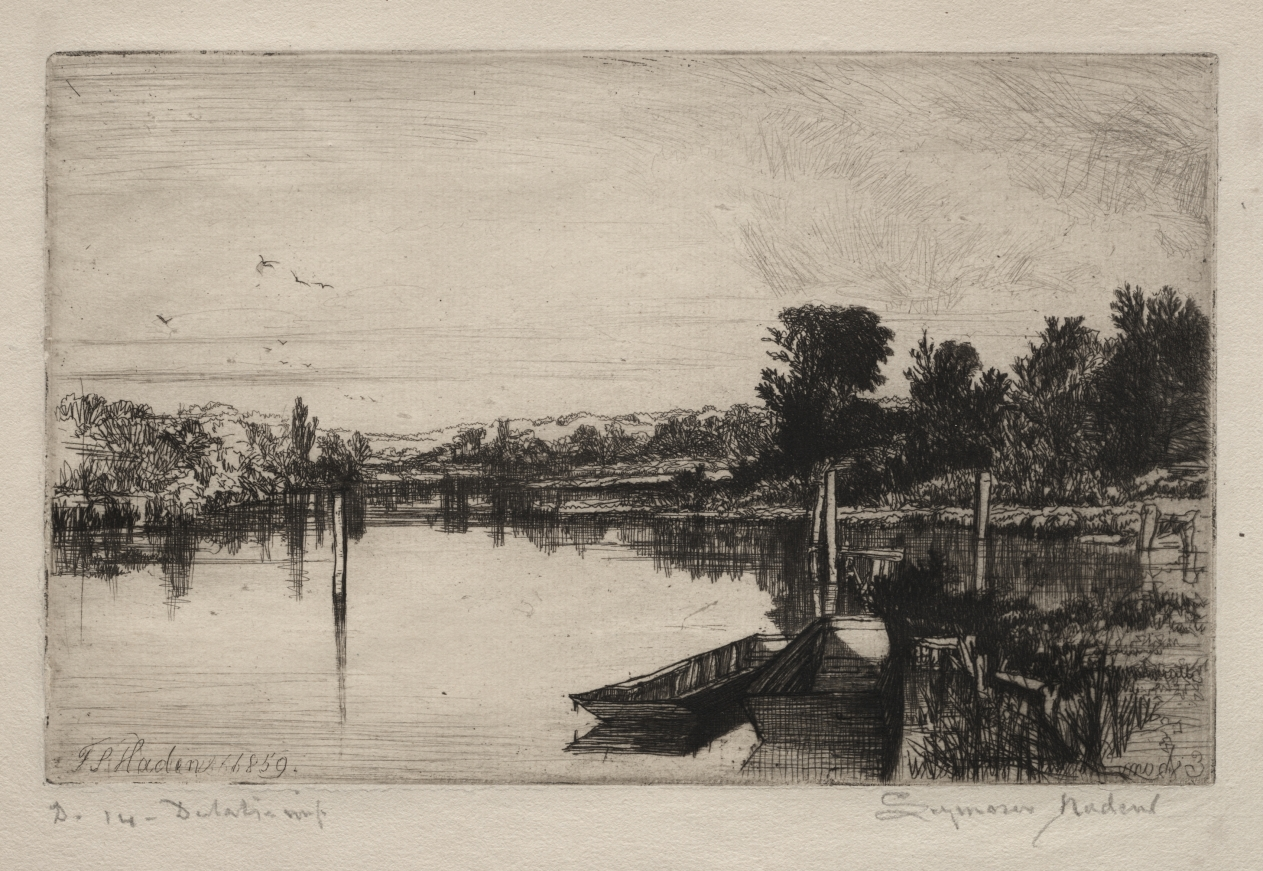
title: Egham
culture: England, 19th century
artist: Francis Seymour Haden (British, 1818–1910)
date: 1859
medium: etching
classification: Print